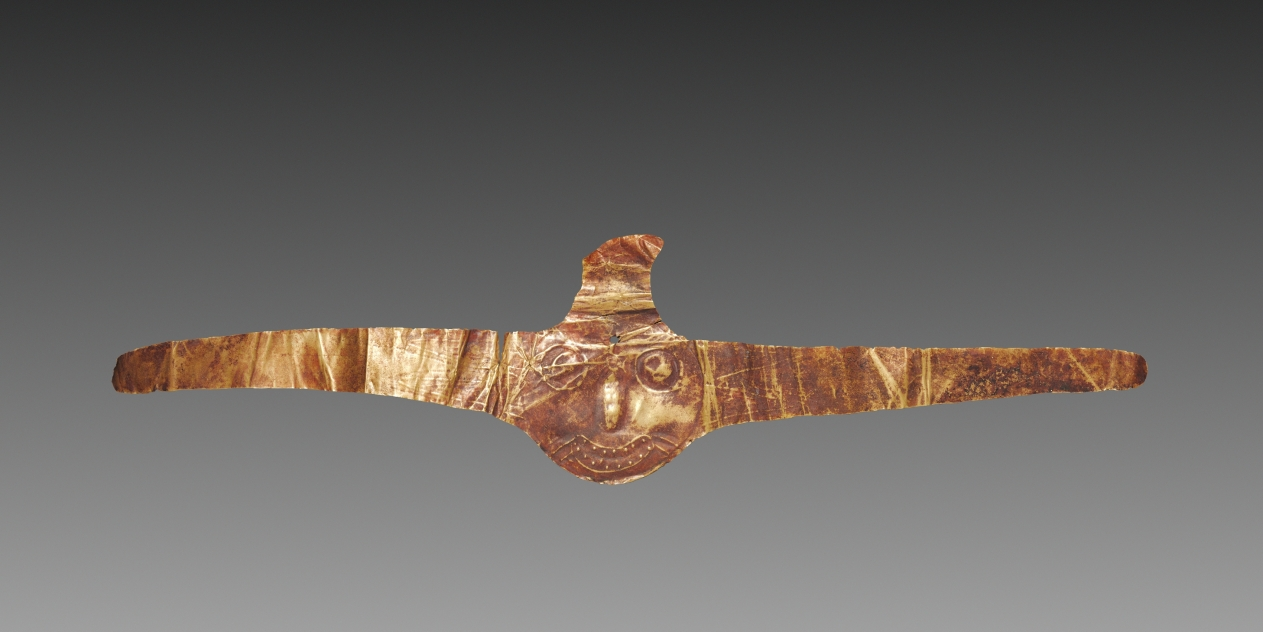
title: Headdress Ornament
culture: Peru, South Coast, Paracas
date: c. 300 BCE–200 CE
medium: hammered and embossed gold-copper alloy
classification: Jewelry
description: Gold ornaments have been discovered among the innermost wrappings of Paracas mummy-bundles, and were probably personal possessions of the deceased. The embossed image in the center of each ornament is a deity face, characterized by protruding eyes and a grinning, toothy mouth. Snakelike appendages emanate from the face. Figures embroidered on Paracas garments are frequently depicted with similarly shaped ornaments, either worn above the forehead or brandished in one hand.